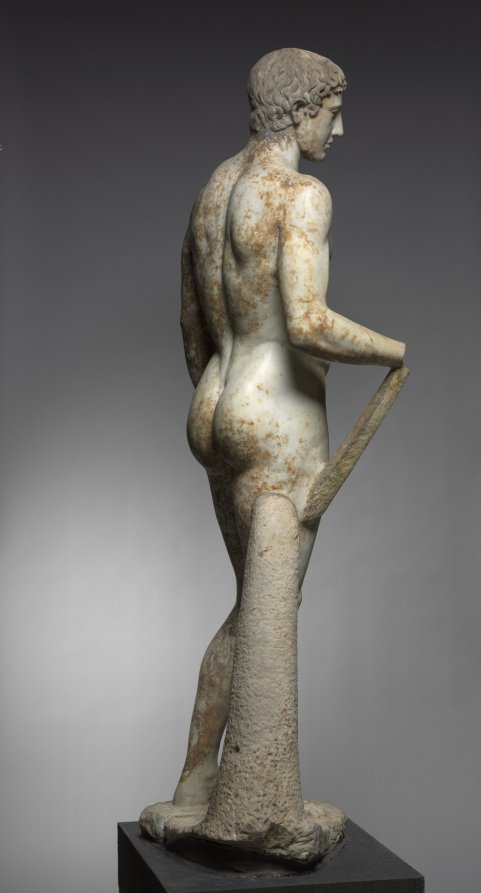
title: Statue of an Athlete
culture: Italy, Roman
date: 1–100 CE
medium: marble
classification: Sculpture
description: This idealized athlete recalls Greek sculptural types invented and popularized during the 400s BC. Large-scale athletes and other sculptures like this were originally created by famous artists as sanctuary dedications. Centuries later, they were widely copied and adapted by Roman sculptors, whose clients sought their own versions of earlier masterpieces. Working in marble rather than bronze, these sculptors added certain elements for stability, such as the struts and the large tree trunk beside the right leg here. Sculptures like this one are profoundly complex, made by and for Romans but descended from Greek ancestors.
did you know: For many years, this sculpture stood in the rotunda of the Cleveland Museum of Art.